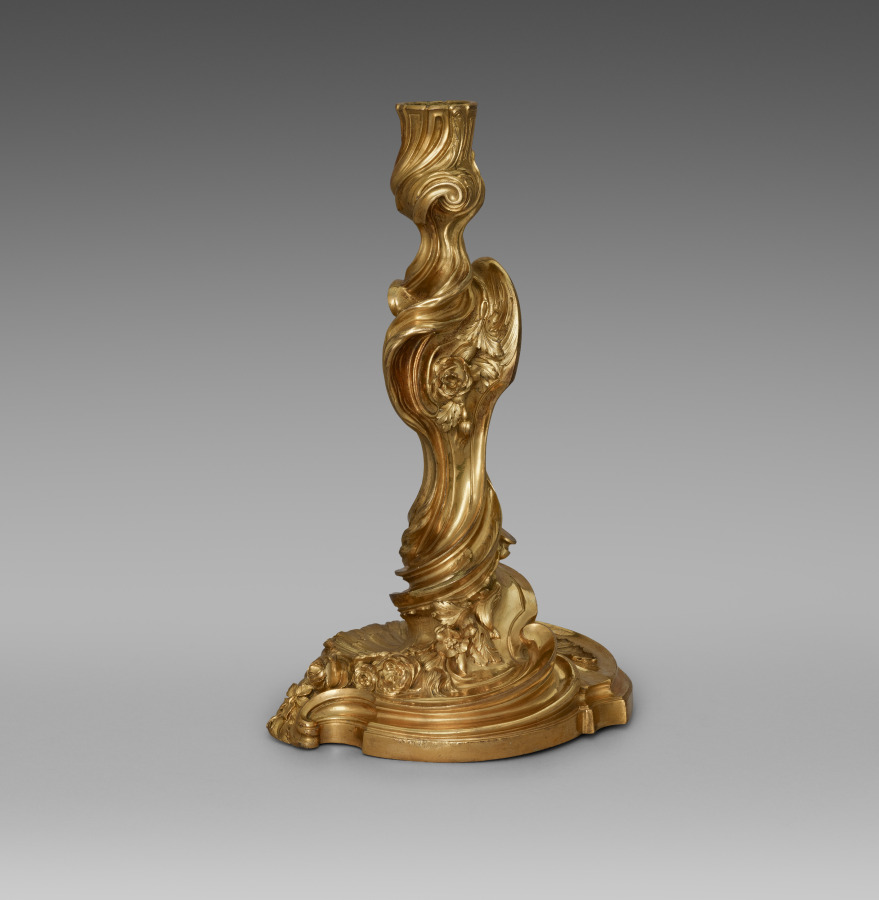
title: Candlestick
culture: France, 18th century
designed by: Juste-Aurèle Meissonnier (French, 1695–1750)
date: c. 1740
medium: gilt metal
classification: Furniture and woodwork